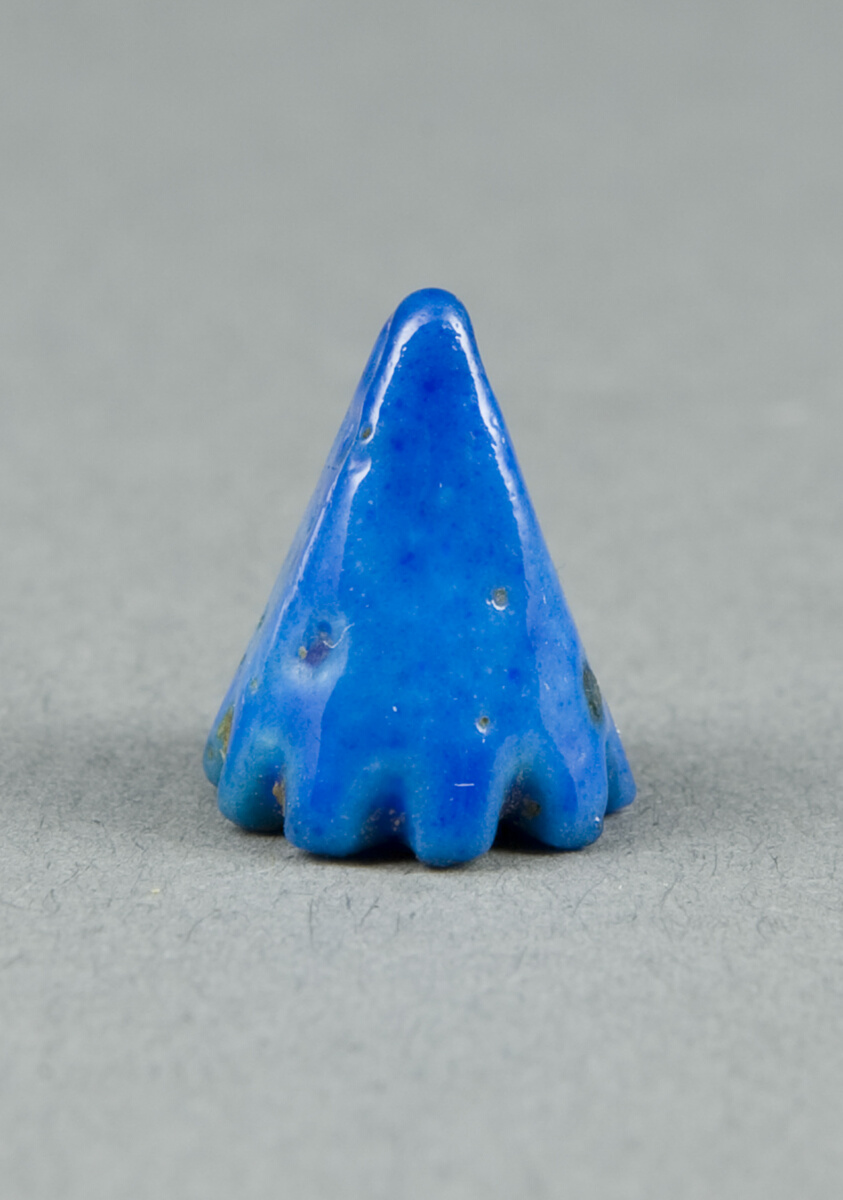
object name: Costume and Accessories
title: Pendant in the Shape of a Lotus Blossom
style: new kingdom, third intermediate period, egyptian, late period (egyptian)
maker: Egyptian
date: New Kingdom–Late Period (about 1550–664 BCE)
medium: Faience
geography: Egypt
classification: pendant (jewelry); jewelry; amulet; ancient art; bead; costume; faïence (composite material)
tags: lotus, flowers